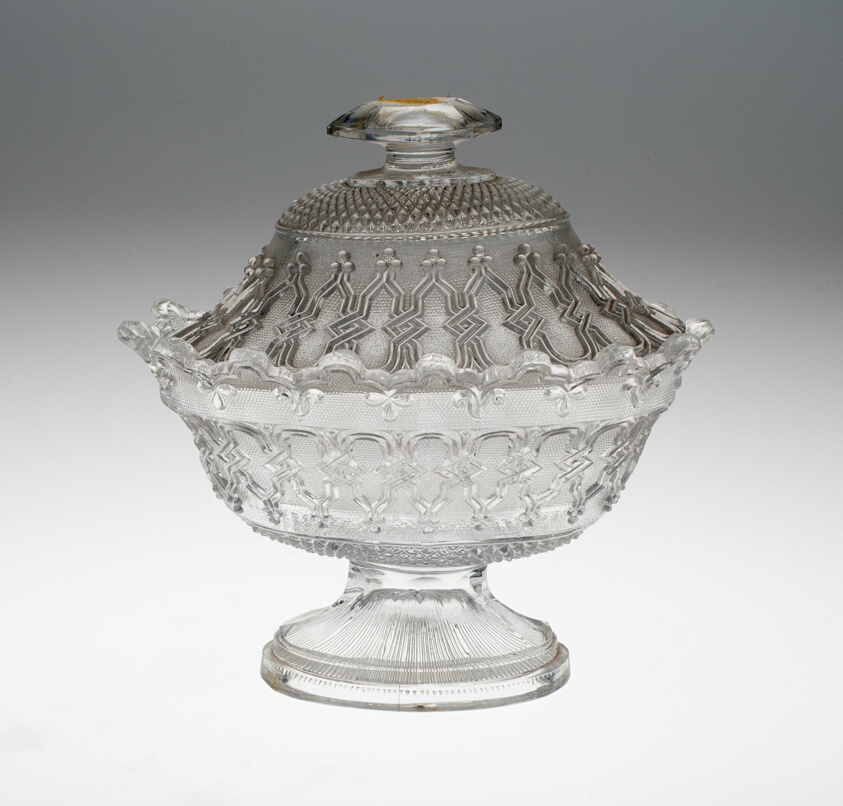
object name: Glass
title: Covered Bowl and Stand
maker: Baccarat Glassworks (French, founded 1764)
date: c. 1830/60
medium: Glass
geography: France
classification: bowl; glass; dish (vessel); european decorative arts